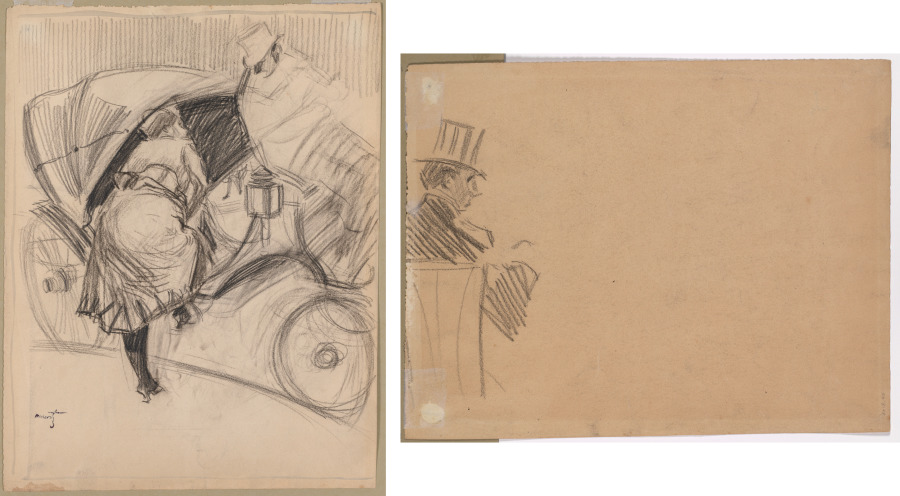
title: Woman Entering a Fiacre (recto); Right Profile of Man Wearing Tall Hat (verso)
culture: France, 19th century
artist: attributed to Jean Louis Forain (French, 1852–1931)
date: probably late 1800s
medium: Charcoal with black ink framing lines (recto); charcoal (verso)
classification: Drawing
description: One side of this double-sided image captures the bustling activity of urban Paris in the late 1800s. A fashionable woman climbs into a fiacre—a four-wheeled carriage—from the street curb. Her driver, seated at front, watches as she enters. The artist’s loose, sketchy rendering of the charcoal further emphasizes the sensation of busy city life evoked in this drawing.